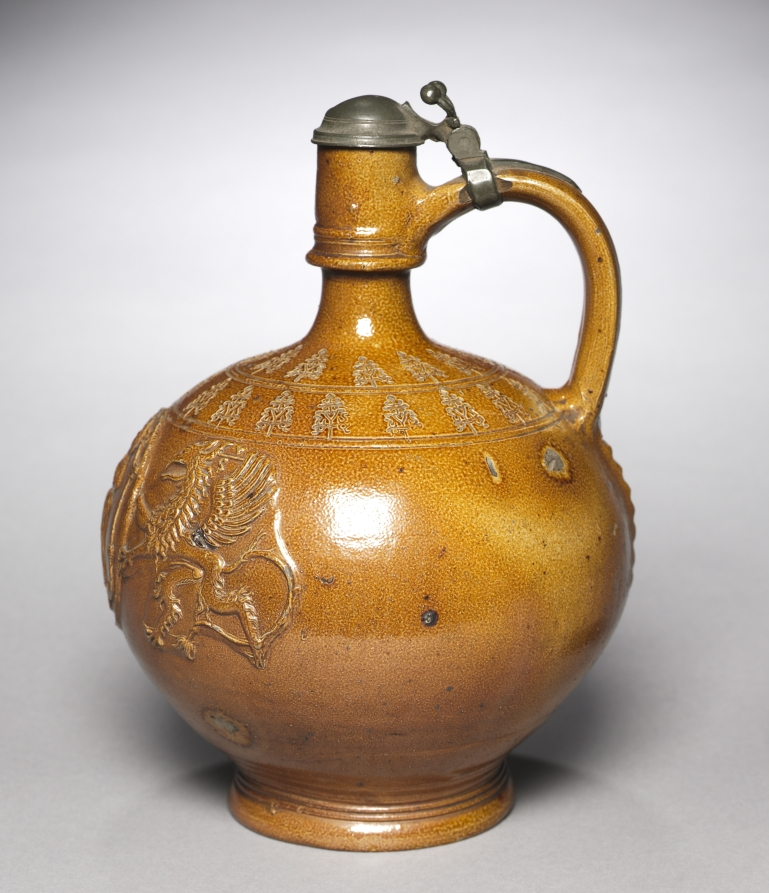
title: Jug with Pewter Lid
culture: Germany, Raeren, 17th century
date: 1602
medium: stoneware, brown glaze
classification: Ceramic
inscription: above the figure of a woman: 1602; above the left griffin: G / E ; above the right griffin: V / S.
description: German Stoneware The production and export of German stoneware reached its peak in the late 1500s. Prized for its durability and stone-like appearance, German stoneware became one of the most widely traded forms of pottery, even finding popularity in early America. The distinctive pebbly glass surface, resembling an orange peel, was achieved by introducing salt into the hot kiln during the firing process. This glaze gave clear definition to the coats of arms or other emblems that often formed the surface decoration on large works, usually jugs.